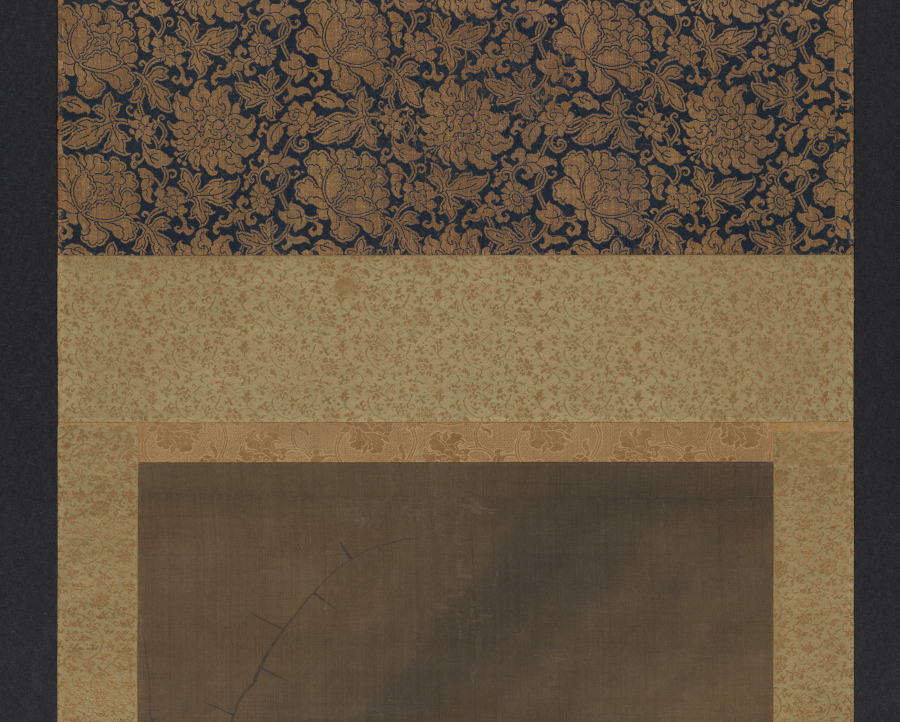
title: Tiger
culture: China, Southern Song dynasty (1127-1279)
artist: Fachang Muqi (Chinese, 1220–1280)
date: c. 1250–79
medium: Hanging scroll; ink and slight color on silk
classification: Painting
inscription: 道有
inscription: 雜華室印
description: The dragon and tiger are tied to the philosophical concept of yin and yang, which describes opposite but complementary forces. The dragon occupies a tiered background of waves and mist. Its luminous head emerges from the darker passages, and its narrow twisting body is serpent-like. By contrast, the close-up view of the tiger emphasizes its bulk. The tiger bends its head to lick its paw while its tail curls in the foreground. In their original Chan Buddhist context, this pair of scrolls likely flanked a central image, like the Bodhisattva Guanyin. The silk has darkened over the centuries, and the slight reddish shading in the tiger’s tongue and nose has faded.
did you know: Fachang Muqi's ink paintings, like this pair, were highly appreciated and collected in Japan.